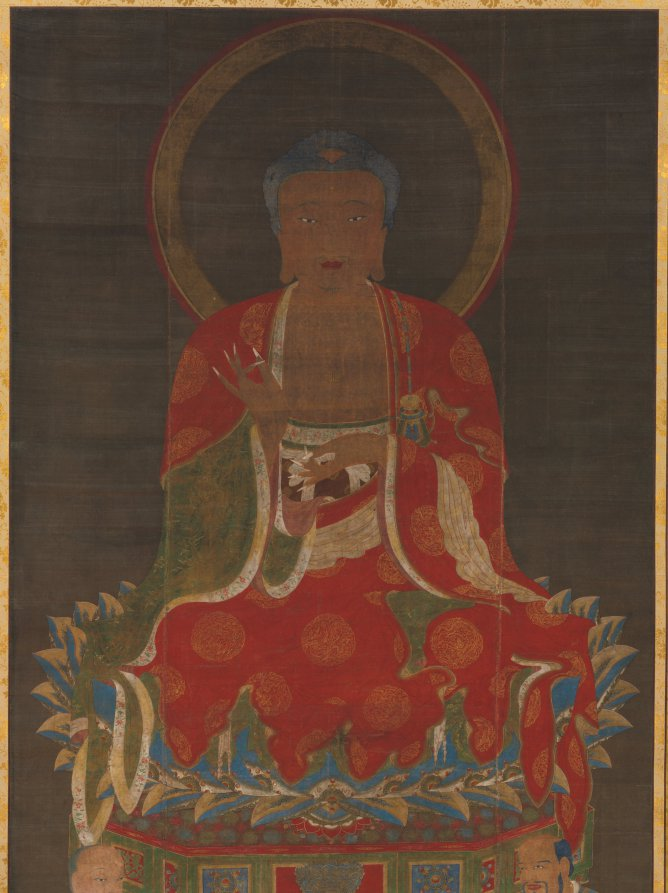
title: Shakyamuni with two attendants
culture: China, Yuan (1271-1368) or early Ming dynasty (1368-1644)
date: 1300s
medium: Hanging scroll; ink, color, and gold on silk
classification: Painting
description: The historic Buddha Shakyamuni is seated on an elaborately decorated pedestal and flanked by two attendants making gestures of devotion. The unknown artist used gold and deeply hued pigments to depict the luxurious fabrics, particularly the golden medallions of swirling dragons and clouds on the Buddha’s red robe. The painting itself is mounted in a Buddhist style with two tiers of fine silk borders. The inner border of gold brocade on a cream background surrounds the painting. The outer border is yellow silk; decorative silk strips, called futai, dangle from the top hanging bar.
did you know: This painting was made on 3 vertical panels of silk stitched together. The joins are visible just outside of Shakyamuni's left and right shoulders.